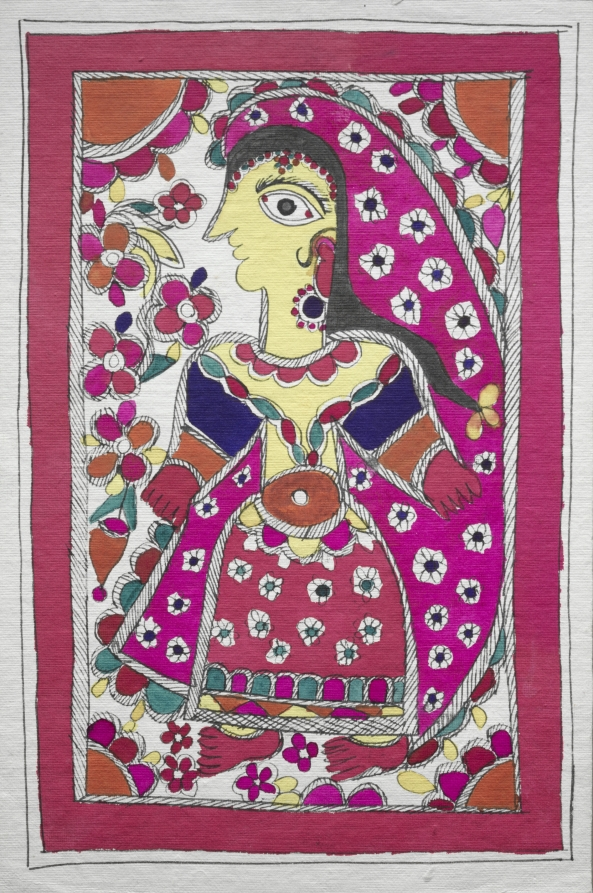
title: Woman in profile facing left (by woman painter)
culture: Eastern India, Bihar State, Mithila or Madhubani School, 20th century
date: 1900s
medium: ink and color on paper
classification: Painting